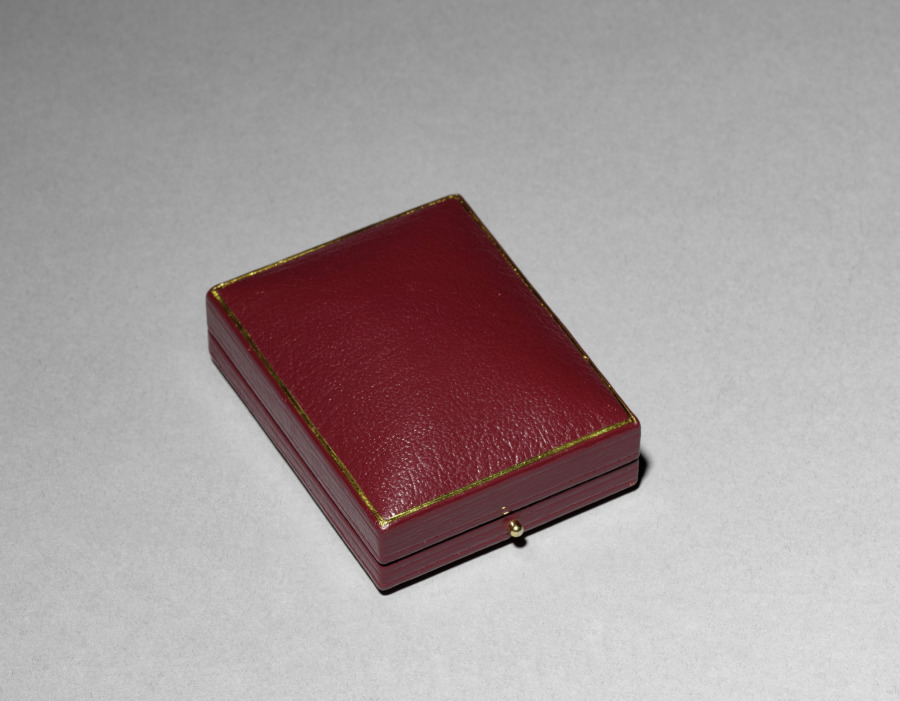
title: Pendant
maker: House of Fabergé (Russian, 1842–1918)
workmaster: Albert Holmström (Finnish, 1876–1925)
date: c. 1910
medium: amethyst, guilloché enamel, diamonds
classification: Jewelry